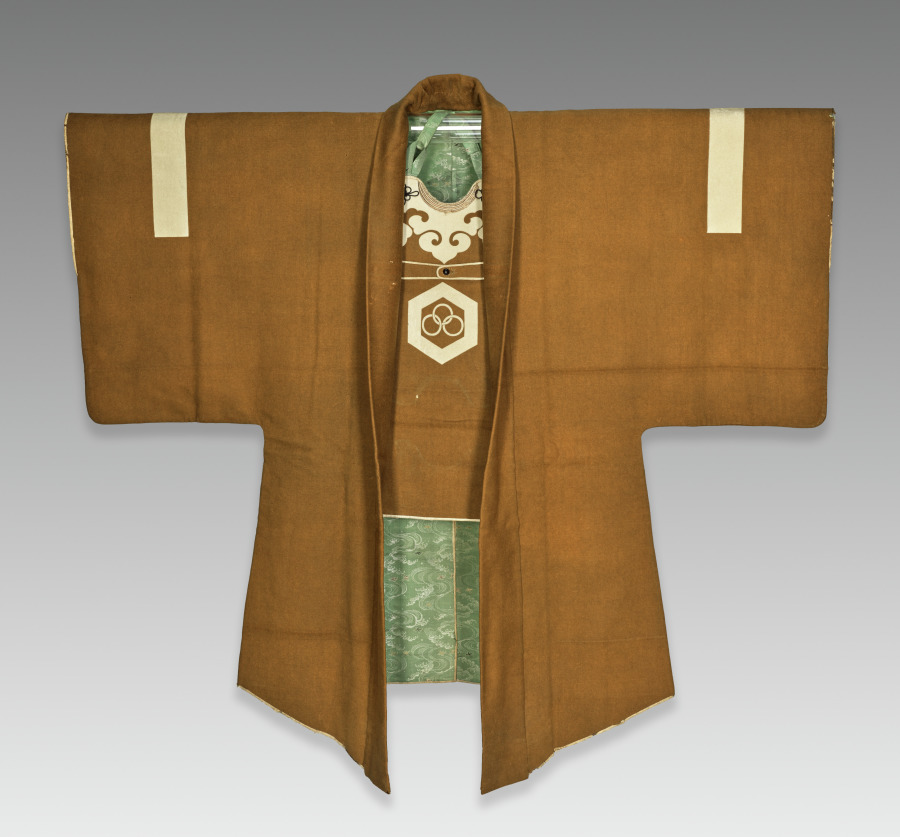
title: Firefighter's Suit (Kaji shōzoku)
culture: Japan, Edo period (1615–1868)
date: late 1700s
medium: Wool (rasha); applique and silk and gold thread cord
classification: Textile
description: Wood architecture in densely populated areas made firefighting a frequent occurrence in the Edo period (1615–1868). Jackets made of leather or wool offered firefighters protection against the flames. Wool was imported from Europe. The triple ring crest in white is of the “three alternating rings” (mitsurin chigai) type framed in a tortoise shell (kikko) motif, and identified the house with which the wearer was affiliated.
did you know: Wool has self-extinguishing properties that protect the wearer from fire.